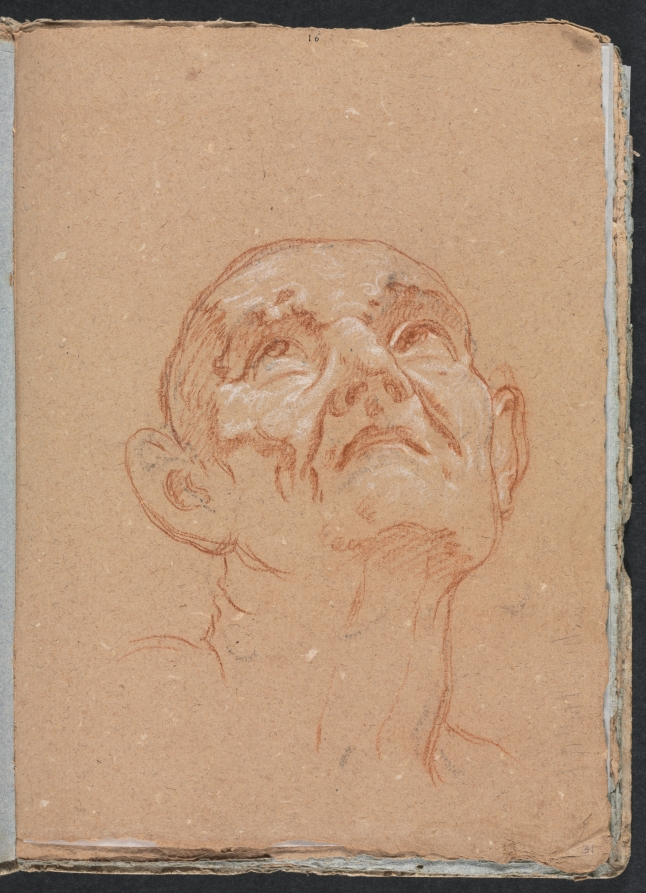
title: Verona Sketchbook: Male head (page 31)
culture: Italy, 18th century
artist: Francesco Lorenzi (Italian, 1723–1787)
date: 1760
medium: red chalk with white heightening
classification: Bound Volume